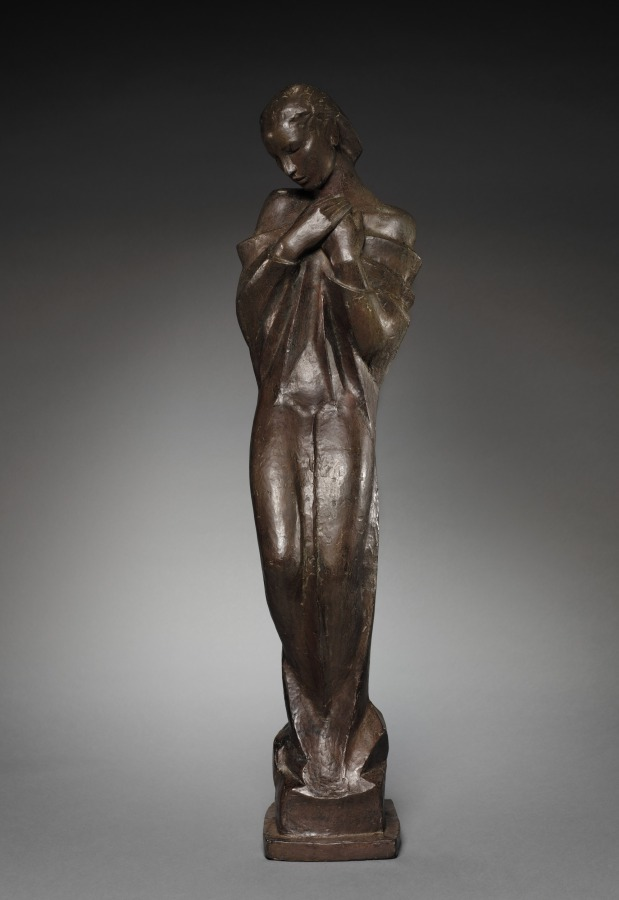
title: Adagio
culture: Germany, 20th century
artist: George Kolbe (German, 1877–1947)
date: 1923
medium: gilt bronze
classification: Sculpture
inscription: Signed lower left corner: "GK II"